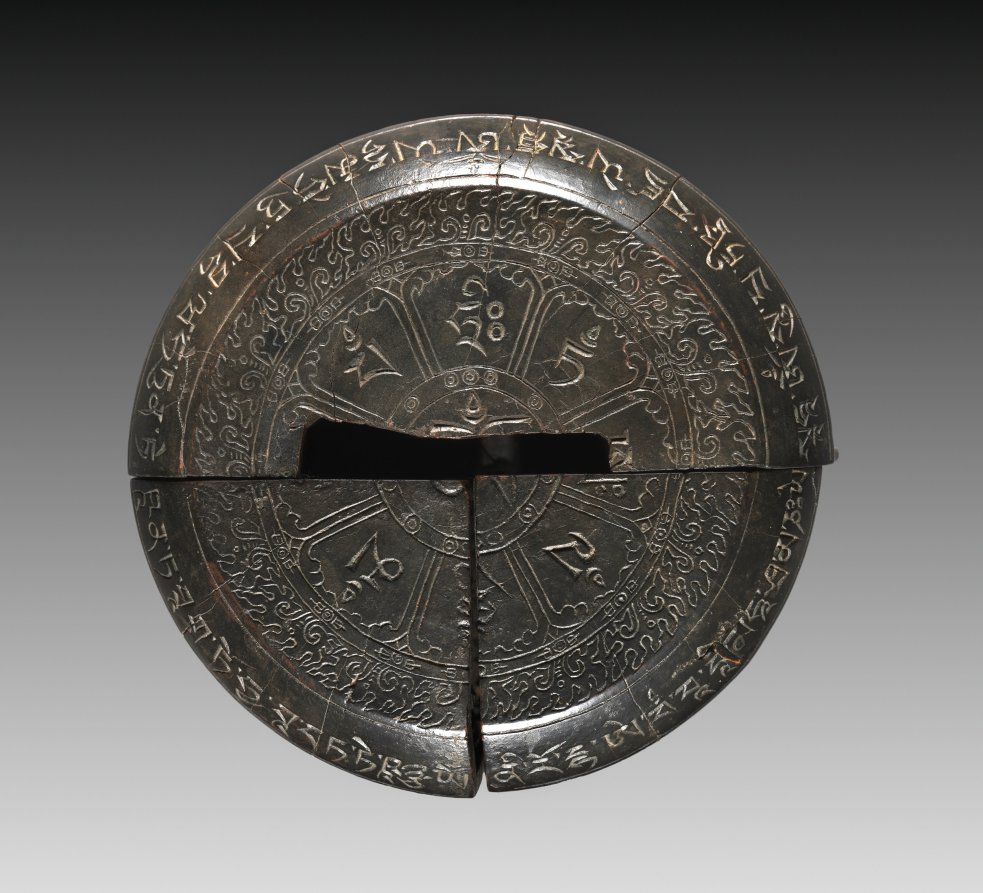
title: Portable Shrine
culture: Tibet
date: c. 1500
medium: wood with mineral pigments and metal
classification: Sculpture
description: Carved from a solid section of a log, the shrine contains images of protectors of tantric Buddhism—a branch that developed in northern India and became prominent in the Himalayas by the 700s. The central figure in the top row is Padmasambhava (Indian, active in Tibet in the 740s), venerated as the founder of one of the four main Tibetan monastic orders. Incised on the exterior are images of protectors, mantras written in Tibetan script, and a sacred funerary monument called a stupa. Tantric practice emphasizes recitation of mantras that invoke the powers of compassion, wisdom, and protection.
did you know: Tantric practice can be performed alone in any location; this shrine could be used by a traveling practitioner for meditation, visualization, prayer, and recitation of mantras.